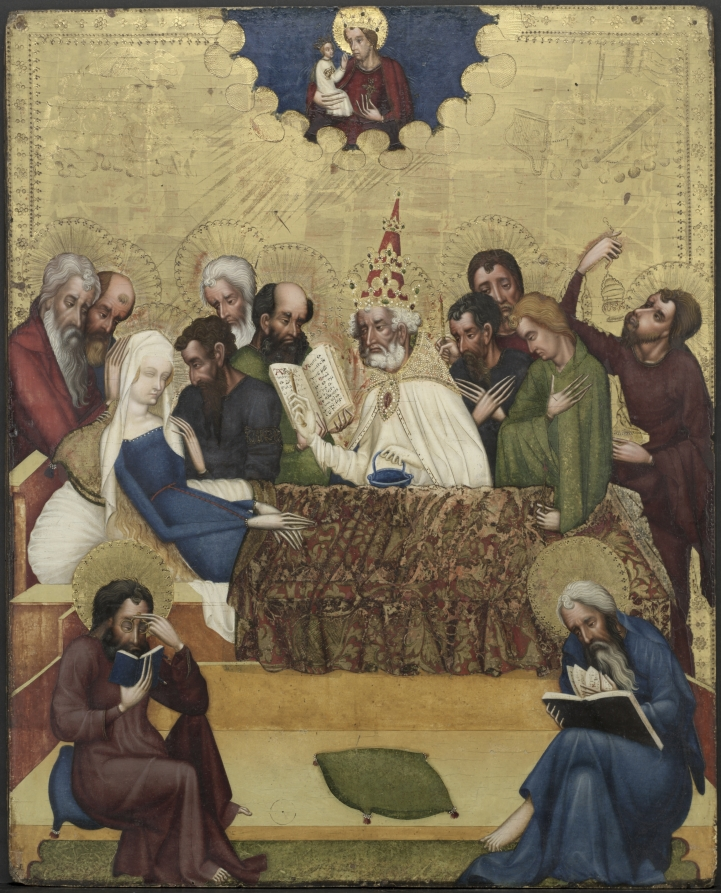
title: Death of the Virgin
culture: Austria, possibly Bohemia, early 15th Century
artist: Master of Heiligenkreuz (Austrian)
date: c. 1400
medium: tempera and oil with gold on panel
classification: Painting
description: Christ’s apostles visit the Virgin upon her deathbed. Saint Peter, wearing white robes and the papal tiara, performs funerary rites, reciting prayers and sprinkling holy water on the Virgin’s body. Above, angels engraved upon the golden background celebrate the assumption of the Virgin heavenward. Once joined to another panel titled The Death of Saint Clare (National Gallery, Washington, D.C.), this double representation of saintly deaths may have been used in funerary services in the convent of Clarissan nuns for which it was made.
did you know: The artist was named for a painting that was once in the Cistercian monastery of Heiligenkreuz in Austria.